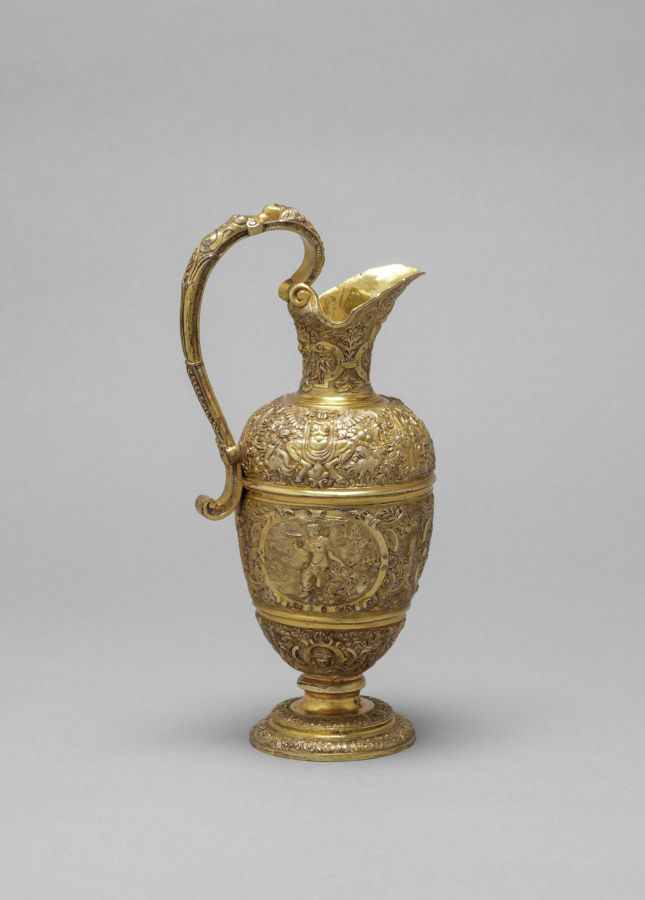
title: Ewer with Relief Scenes of Allegories of War, Peace, and Abundance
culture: France, 17th century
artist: workshop of Caspar Enderlein (German)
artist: copy after François Briot (French)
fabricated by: Hans Sigmund Geisser (German)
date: 1645–65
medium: silver gilt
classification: Silver